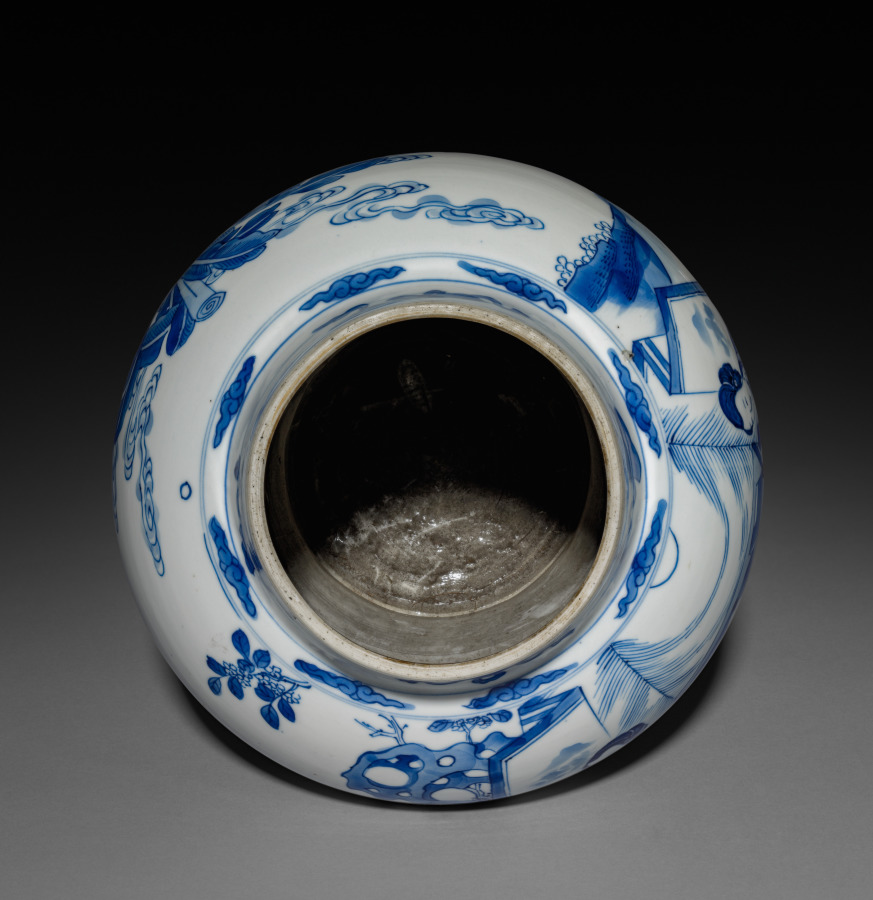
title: Vase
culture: China, Qing dynasty (1644–1911), Qianlong reign (1736–95)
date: 1736–95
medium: porcelain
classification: Ceramic